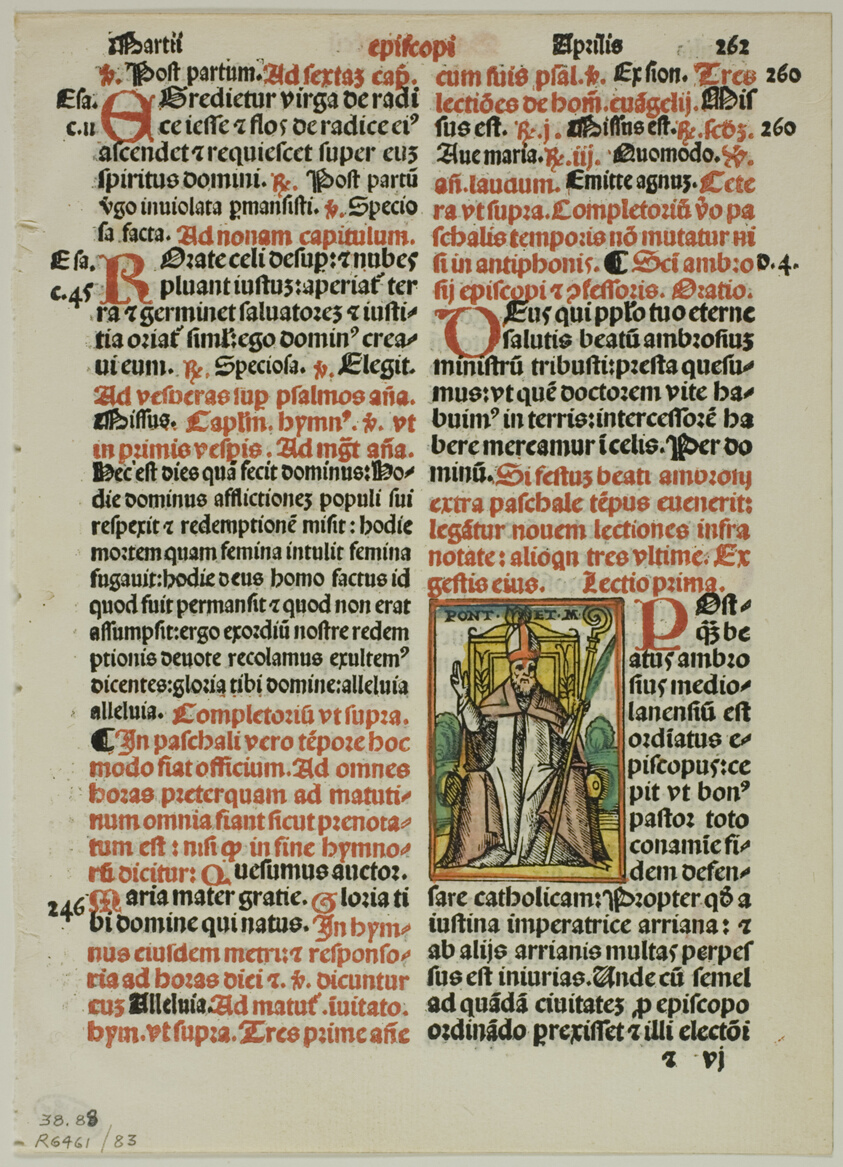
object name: Print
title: A Bishop from Breuiarium iuxta ritu predicatorum, plate 83 from Woodcuts from Books of the XVI Century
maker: Unknown Artist (Italian, 16th century); assembled by Max Geisberg (Swiss, 1875-1943)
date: 1514, assembled into portfolio 1937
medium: Hand-colored woodcut on paper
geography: Italy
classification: woodcut; print; prints and drawing